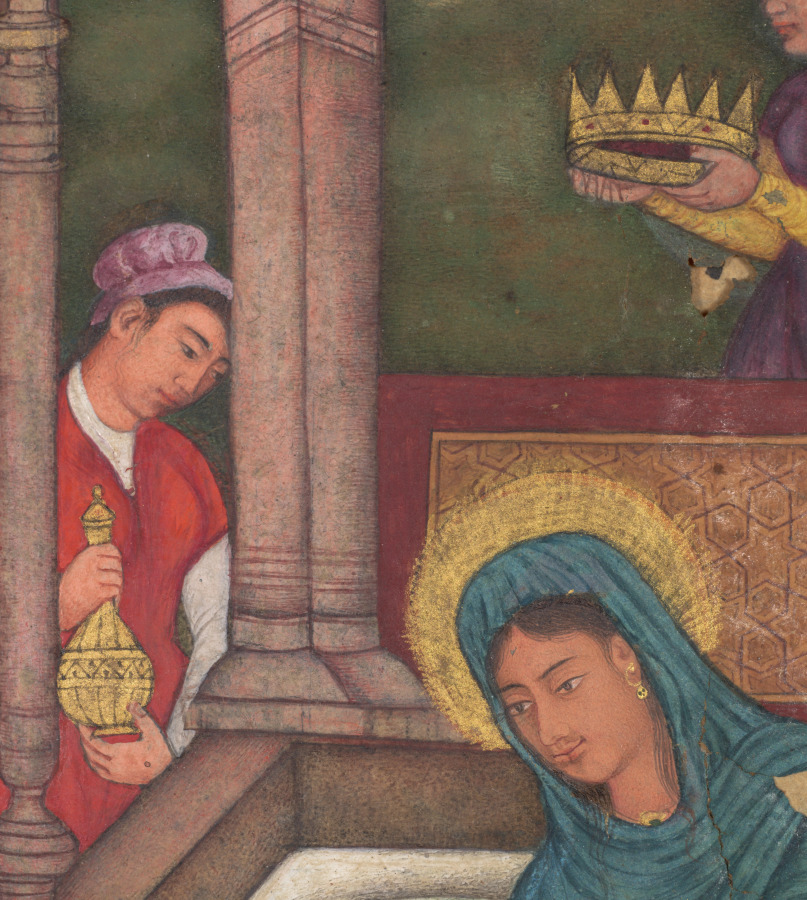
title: The Annunciation (folio 15 recto), from a Mirror of Holiness (Mir’at al-quds) of Father Jerome Xavier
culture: Mughal India, Allahabad, made for Prince Salim (1569–1627)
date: 1602–4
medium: Gum tempera, ink, and gold on paper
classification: Manuscript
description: Mary gazes down at the angel Gabriel as he kneels reverently, like a humble messenger, delivering the news that Mary will give birth to the son of God. His multicolored wings are forced within the boundary line of the painting field, visually implying a sense of subordination. Unlike many of the paintings in the Mirror of Holiness, the Annunciation is a familiar subject in European art, but the emphases vary. The Indian version depicts her as a queen, with a crown held above her head and attendants standing by.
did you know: The text states that Mary was only age 13 1/2 when the angel Gabriel came to her.